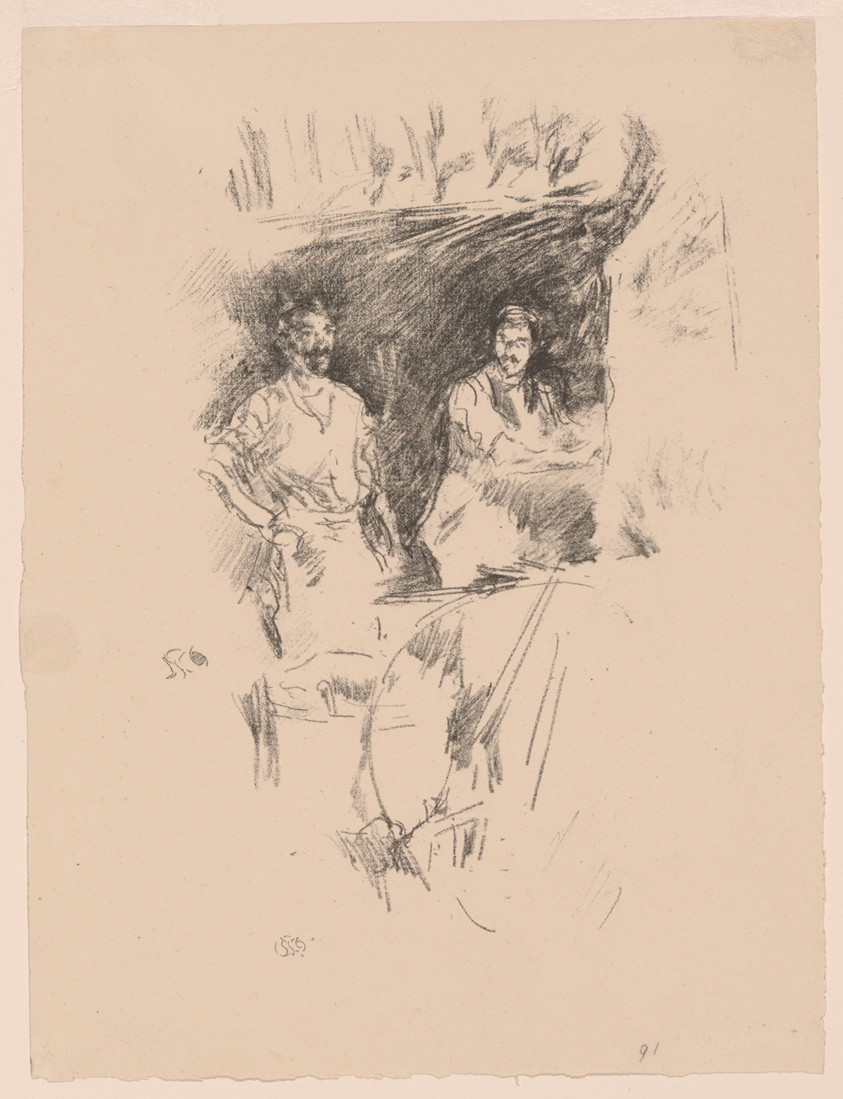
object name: Print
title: The Brothers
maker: James McNeill Whistler (American, 1834-1903)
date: 1895/96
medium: Transfer lithograph in black ink with graphite additions, on cream wove proofing paper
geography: United States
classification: transfer lithograph; lithograph; print; prints and drawing; paper